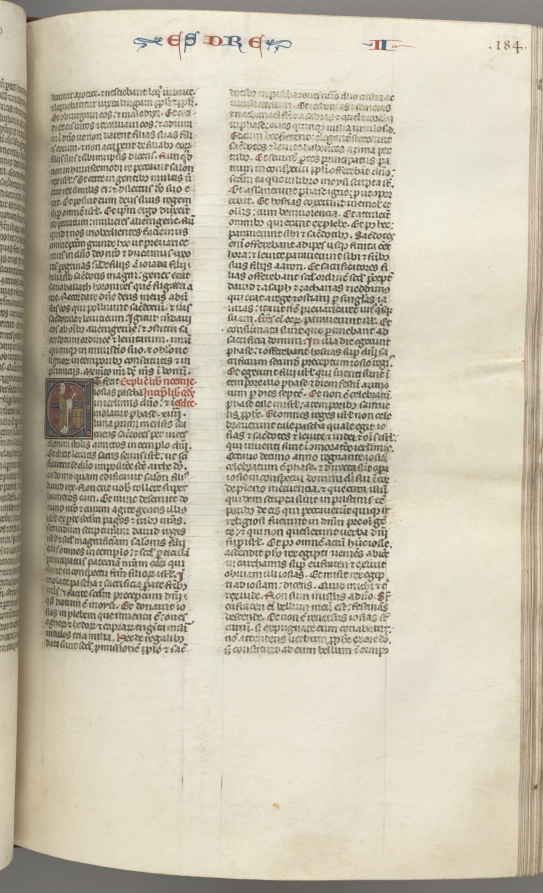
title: Fol. 184r, Ezra II, historiated initial E, a priest censing an altar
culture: Southern France, Toulouse(?), 13th century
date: c. 1275–1300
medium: ink, tempera and gold on vellum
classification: Bound Volume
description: Biblical manuscripts were highly prized and important possessions of churches, monasteries, cathedral schools, and universities throughout medieval Europe. The biblical texts were known as the vulgate, the translations made by Saint Jerome in the fourth century from Hebrew and Greek into Latin, which became the definitive and official Latin version of the Roman Church. In the 13th century, the bible was, for the first time, produced as a single volume with an officially sanctioned sequence to its books and chapters as illustrated by this example. The very extensive decoration of this bible is arranged hierarchically to indicate the relative importance of the various texts so that full or almost full-page initials mark the openings of the first prologue, Genesis, and the first Gospel; historiated initials mark the beginning of each book and illuminated initials mark the Prologues.